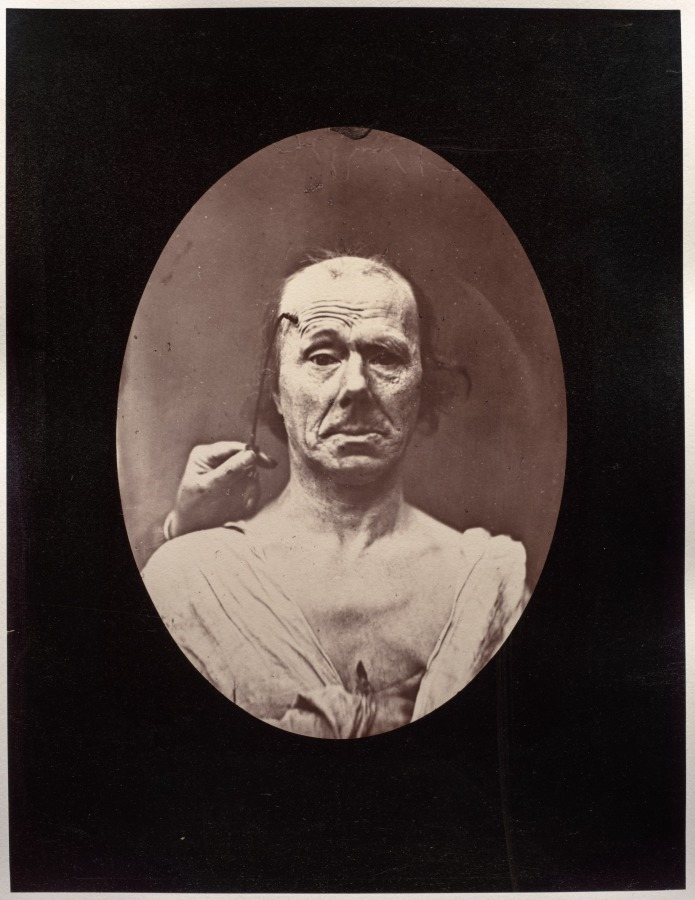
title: Figure 7: Étude du méchanisme et de l'expression du muscle frontal chez un vieillard: à droit, attention; à gauche, repos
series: Mécanisme de la physionomie humaine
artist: Guillaume-Benjamin-Amand Duchenne (de Boulogne) (French, 1806–1875)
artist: Adrien Tournachon (French, 1825–1903)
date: c. 1856, printed 1862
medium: Albumen print from glass plate negative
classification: Photograph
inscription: On the verso, lower left corner, in graphite, “fig. 7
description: Duchenne embarked on the first scientific, systematic exploration of the physiology of human facial expression and hoped, through photographs of his experiments, to teach artists how to portray those emotions. The experiments were performed by applying electrical stimulation to a single muscle on one side of the face, so that the viewer could clearly see the impact of the muscular contraction.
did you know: Duchenne, a neurologist at a hospital for the poor in Paris, turned to photography to record the grammar of human expression.